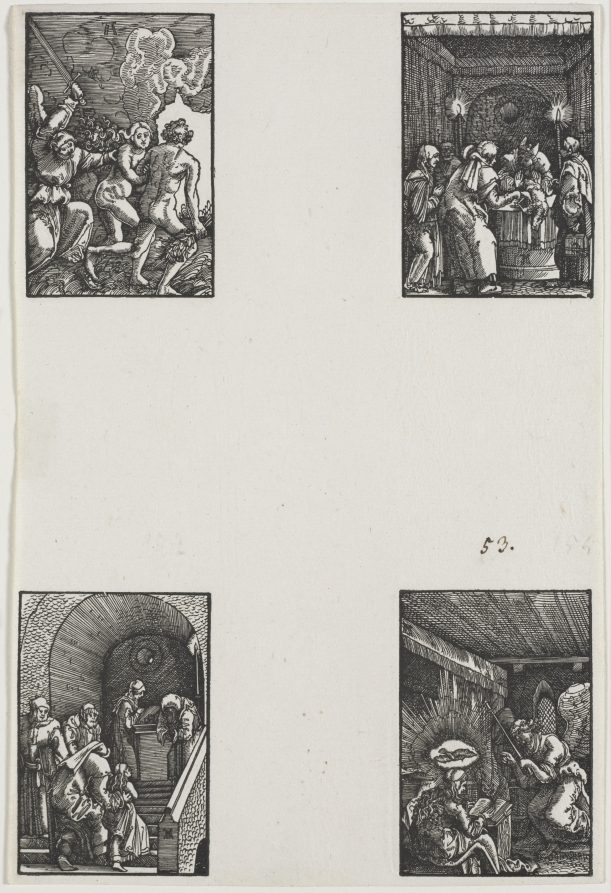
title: The Fall and Redemption of Man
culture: Germany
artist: Albrecht Altdorfer (German, c. 1480–1538)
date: c. 1515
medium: woodcut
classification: Print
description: These eight woodcuts come from a series of forty which illustrate the story of Christian redemption from original sin to the Last Judgement. Probably to maximize printing efficiency and quality, eight woodblocks were printed on each of five sheets of paper, but the subjects are not in the correct chronological order. Prior to sale, the sheets were cut into eight pieces. The sheets in the museum's set were only cut in half, preserving four prints per page. The numbers after the titles of the individual images indicate each scene's place within the narrative. By 1513, Altdorfer had already executed a number of small, finely detailed engravings. Because it is difficult to achieve the same degree of precision using woodcut, The Fall and Redemption of Man is a technical tour de force. Probably inspired by Albrecht Dürer's Small Passion (1511)-but almost double the size-the only contemporaneous comparable set of fine miniature woodcuts, Dance of Death, was designed by Hans Holbein in about 1526 (on view nearby).